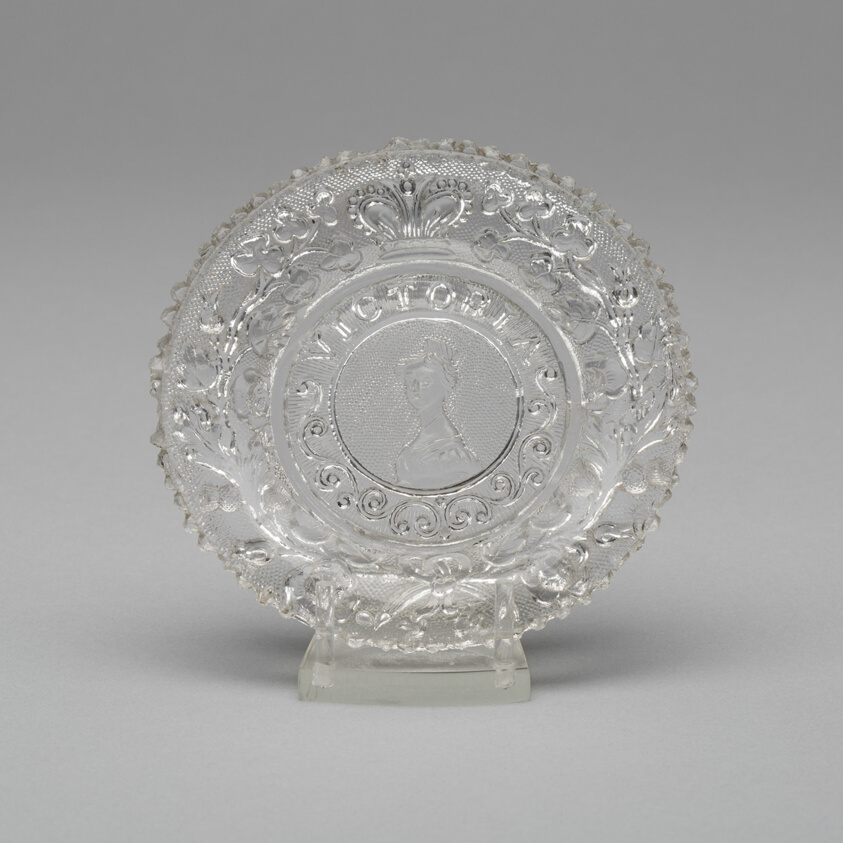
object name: Glass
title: Cup plate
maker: Artist unknown (American, 19th century)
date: c. 1838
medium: Pressed glass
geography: United States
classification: plate (general, dish); glass; american decorative arts; american arts; decorative arts